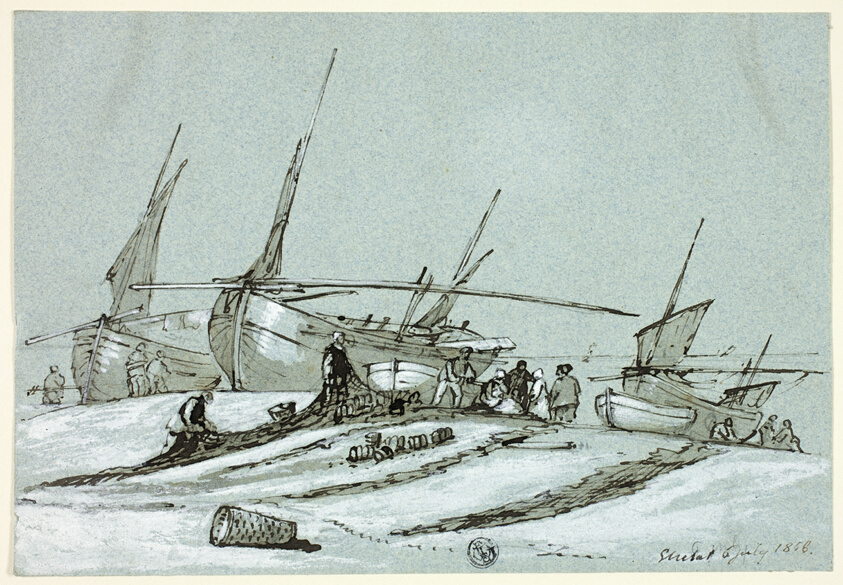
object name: Drawing and Watercolor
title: Entretat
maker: Attributed to Clarkson Stanfield; English, 1793-1867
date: July, 1858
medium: Pen and brown ink, with brush and brown wash and white gouache, over traces of graphite, on blue wove paper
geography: England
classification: pen and ink drawings; drawings (visual works); prints and drawing